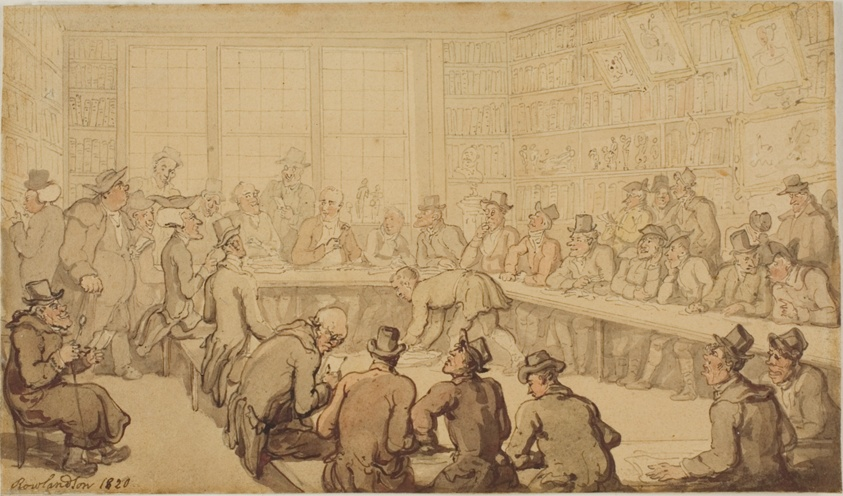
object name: Drawing and Watercolor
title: Study for Dr. Syntax at a Book Auction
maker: Thomas Rowlandson (English, 1756-1827)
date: 1820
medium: Pen and brown and gray ink with brush and watercolor, on tan wove paper, laid down on card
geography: England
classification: watercolor; drawings (visual works); prints and drawing